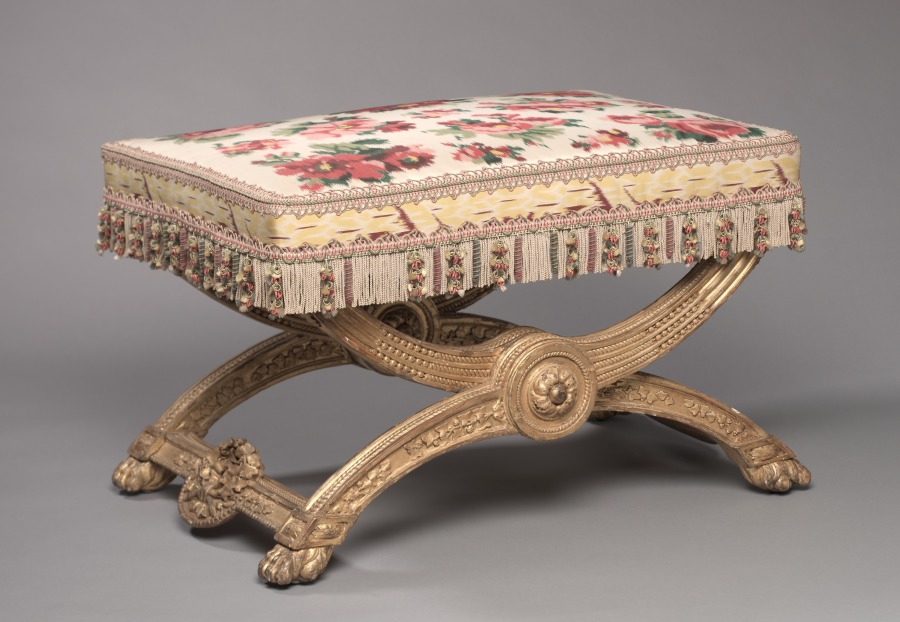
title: Stool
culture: France, 18th century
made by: Jean-Baptiste-Claude Sené (French, 1748–1803)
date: 1786–1787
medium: carved and gilded wood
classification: Furniture and woodwork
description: This stool was made in 1786-1787 for the Queen's gaming room at the palace of Compiègne.